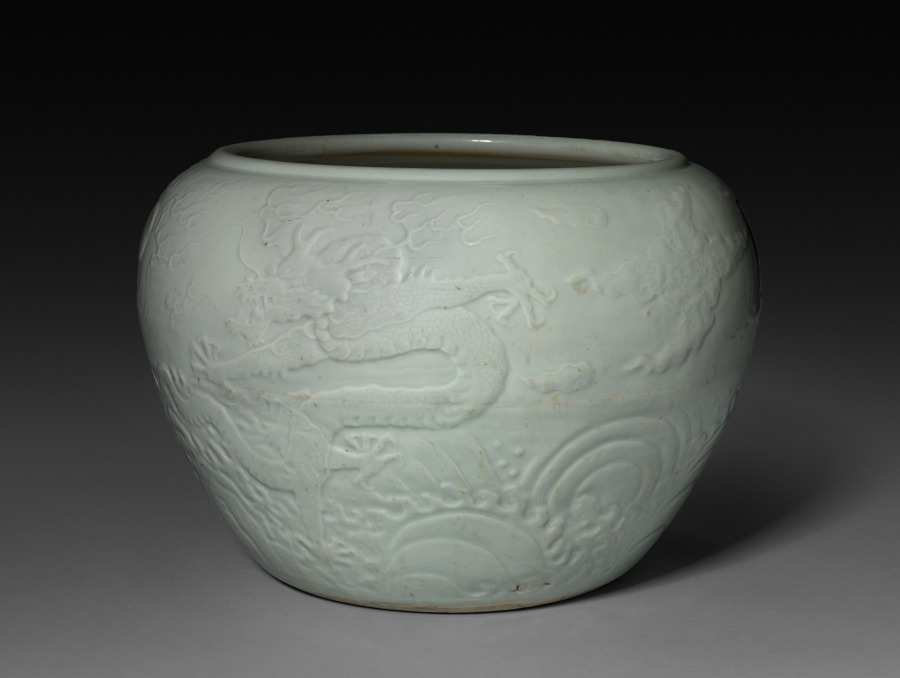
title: Jardiniere with Dragon in Waves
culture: China, Jiangxi province, Jingdezhen kilns, Qing dynasty (1644-1911), Kangxi reign (1662-1722)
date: 1662–1722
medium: porcelain with molded and incised decoration and light celadon glaze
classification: Ceramic